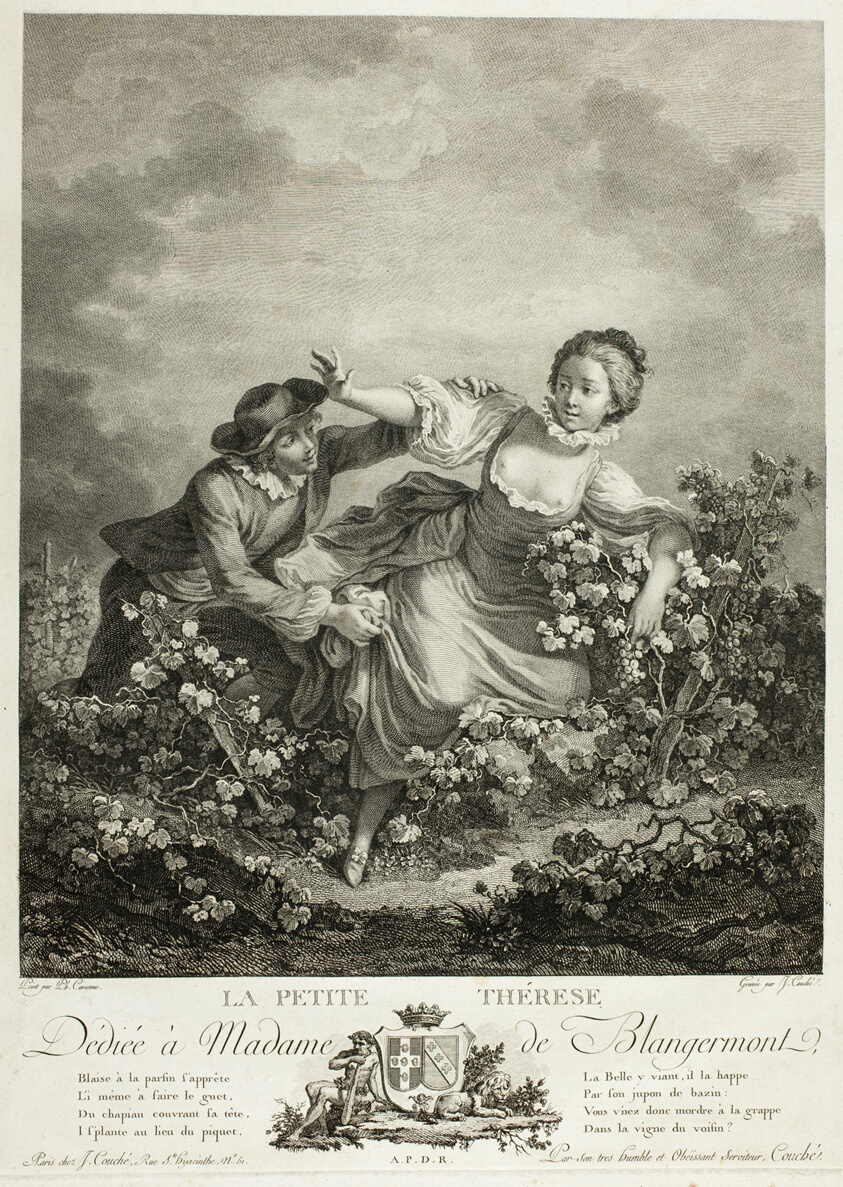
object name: Print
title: Little Theresa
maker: Jacques Couché (French, born 1750); after Jacques-Philippe Caresme (French, 1734-1796); published by Jacques Couché (French, born 1750)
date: c. 1783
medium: Engraving and etching on ivory laid paper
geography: France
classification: engraving; print; prints and drawing